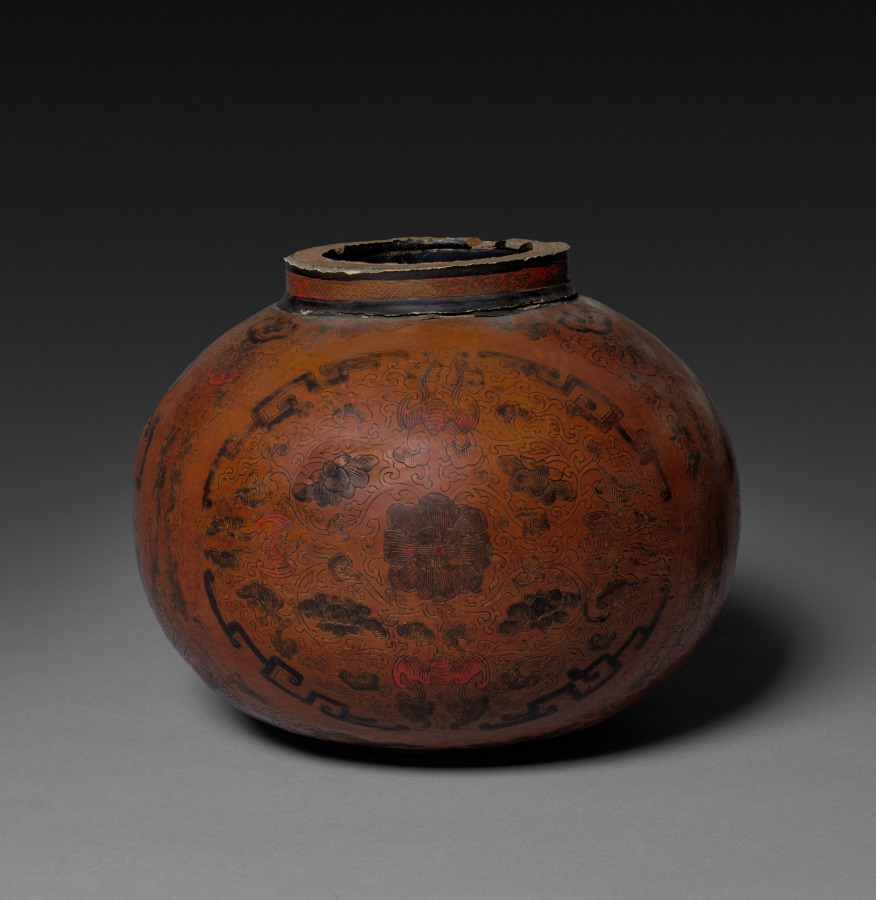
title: Vase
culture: China, Qing dynasty (1644-1911)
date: 1644–1911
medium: lacquered wood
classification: Lacquer